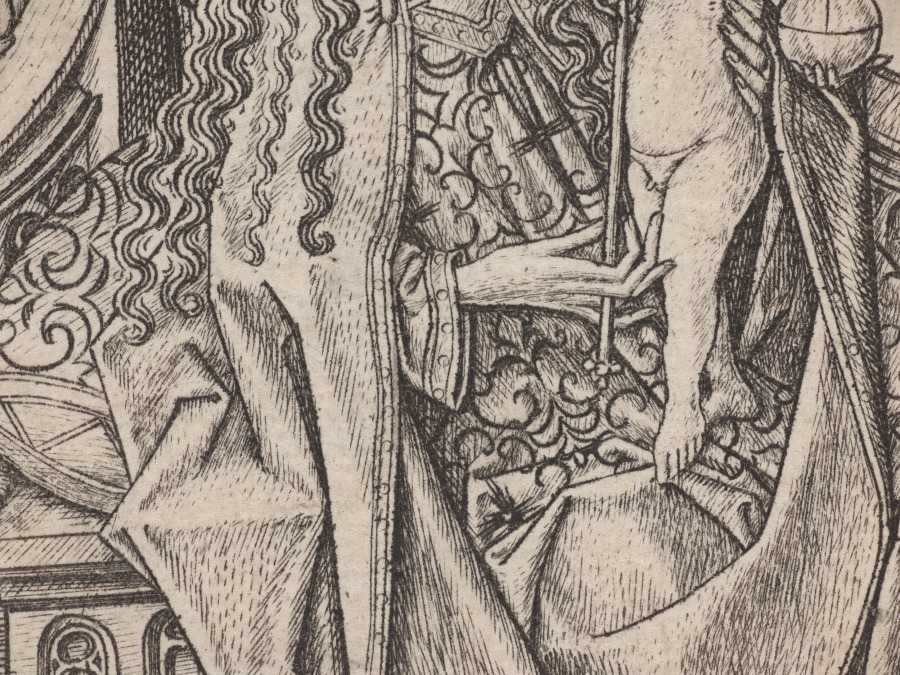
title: Madonna Enthroned with Eight Angels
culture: Germany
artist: Master ES (German, active 1450–67)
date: 1467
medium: engraving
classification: Print